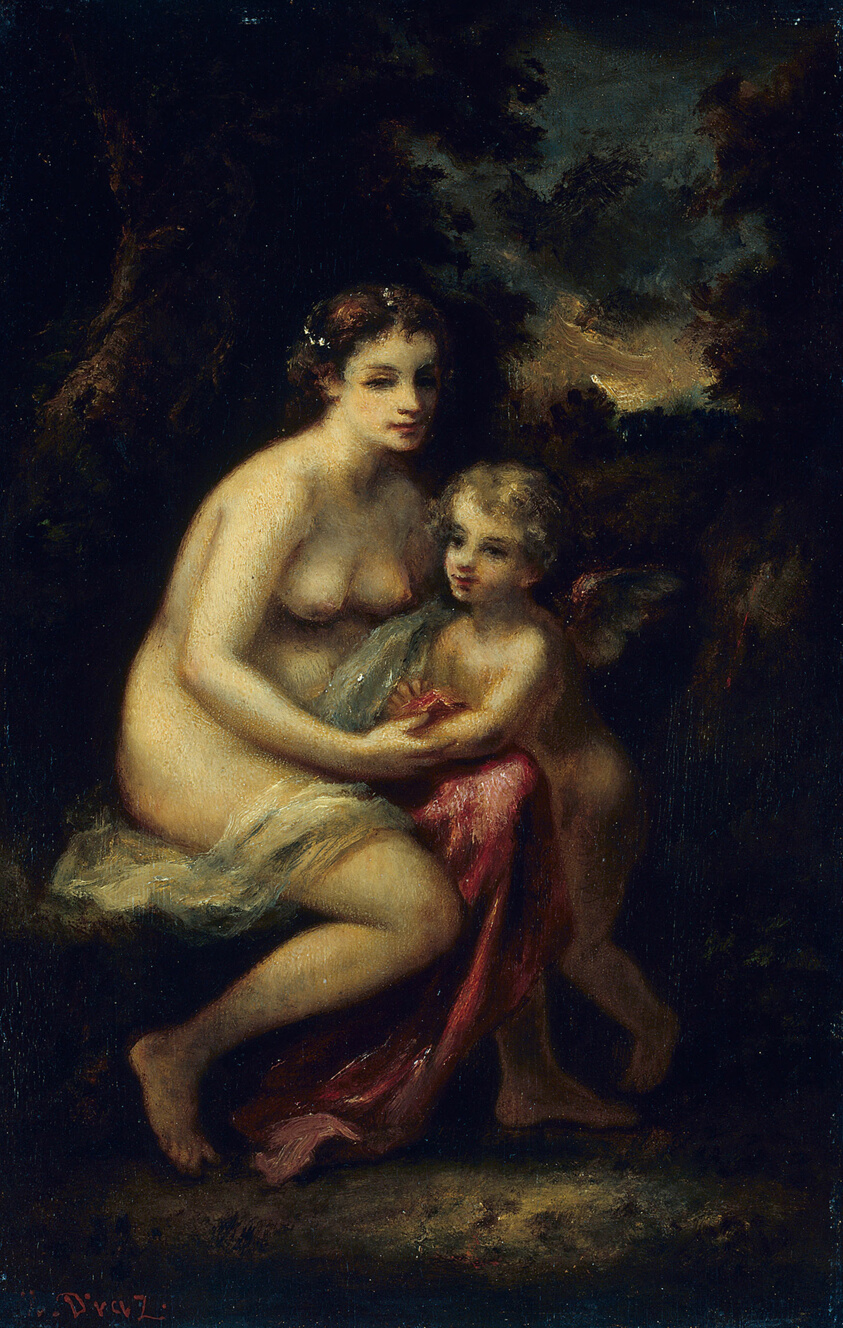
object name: Painting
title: Education of Cupid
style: nineteenth century, 19th century, Barbizon School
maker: Narcisse Virgile Diaz de la Peña (French, 1807–1876)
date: c. 1859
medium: Oil on panel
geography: France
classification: painting; france; french; oil on panel; oil paintings (visual works); paint; european painting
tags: Venus, children, cloth, cupids, France, French, Greek gods, Greek mythology, landscape, nudes, trees, woman, woman with children